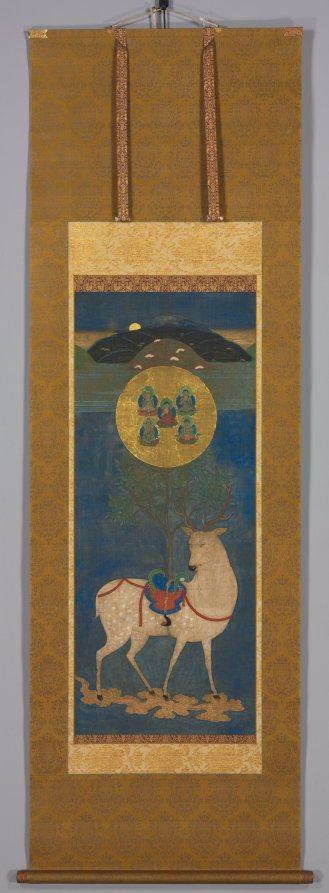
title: Kasuga Deer Mandala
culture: Japan, Nanbokuchō period (1333–92) to Muromachi period (1392–1573)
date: mid-1300s–1400s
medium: hanging scroll; ink, color and gold on silk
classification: Painting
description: Riding on a rolling cloud, a spotted deer wears a brightly colored saddle. The saddle supports a branch of the evergreen Sakaki tree, trailing wisteria vines that cradle a large golden mirror. Within the mirror sit the five Buddhist manifestations (honjibutsu) of the deities (kami) of the Kasuga Grand Shrine in Nara. The presence of the deer—the vehicle of the deity Takemikazuchi no Mikoto of the first of the five halls of the shrine—and the characteristics of the mountain range at the top of the painting make clear the association with the sacred site of Kasuga. The painting was likely created for an individual’s personal devotions to the Kasuga deities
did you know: The deity Takemikazuchi no Mikoto is shown as the Buddha Shakyamuni with a red robe.